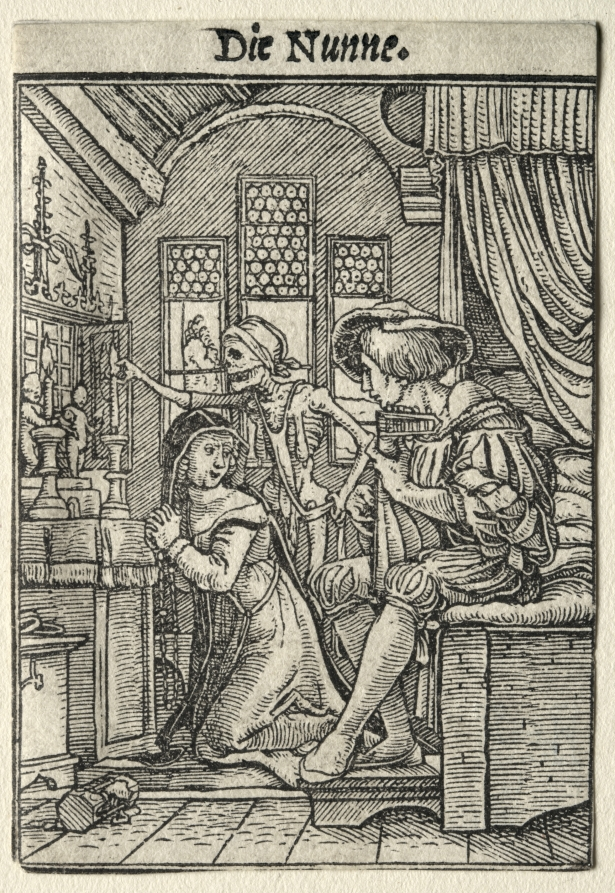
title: Dance of Death: The Nun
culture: Germany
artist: Hans Holbein the Younger (German, active England and Switzerland, 1497/98–1543)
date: c. 1526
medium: woodcut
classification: Print